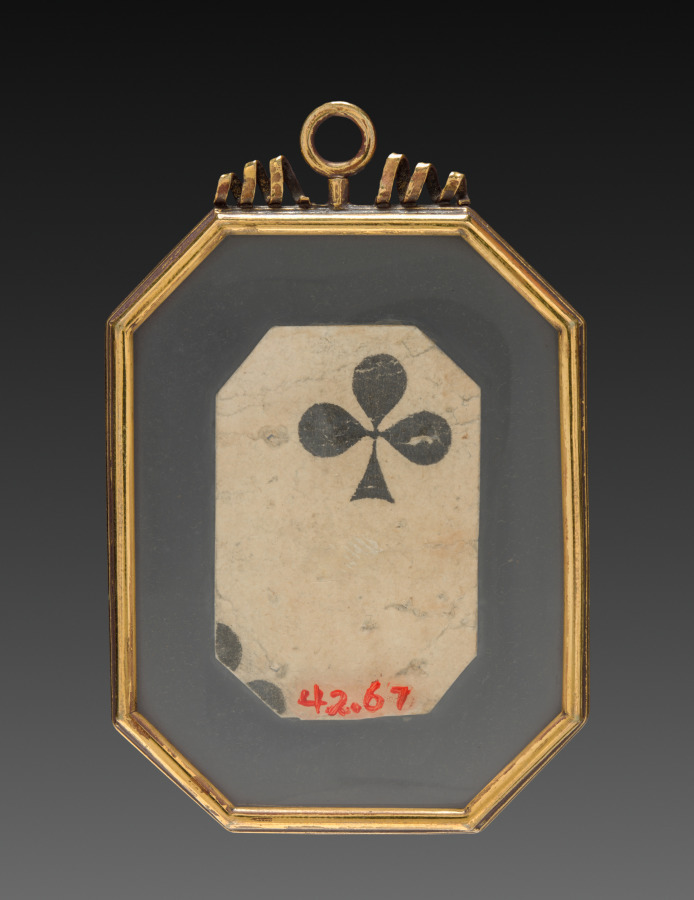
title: Locket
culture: France, 18th century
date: 1700s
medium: gold and crystal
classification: Jewelry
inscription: "No. 32./ Dossin de/ Fauteuil/ 6480."